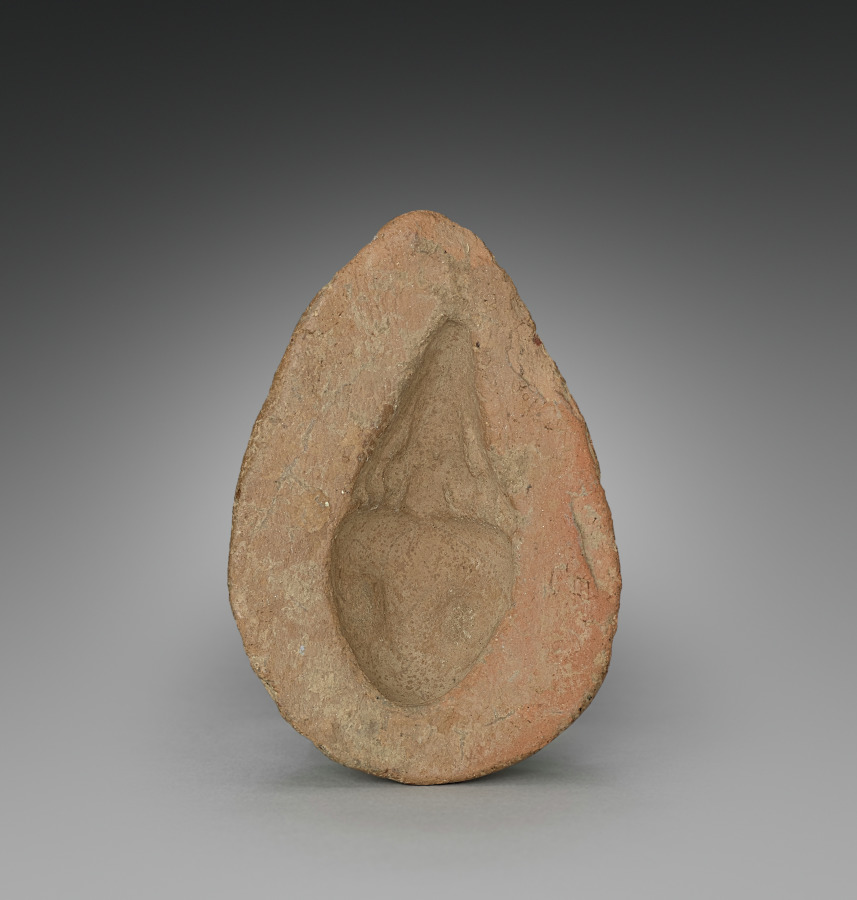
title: Mould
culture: India, Kashmir, 8th-9th Century (?)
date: 700s-800s(?)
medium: terracotta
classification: Ceramic